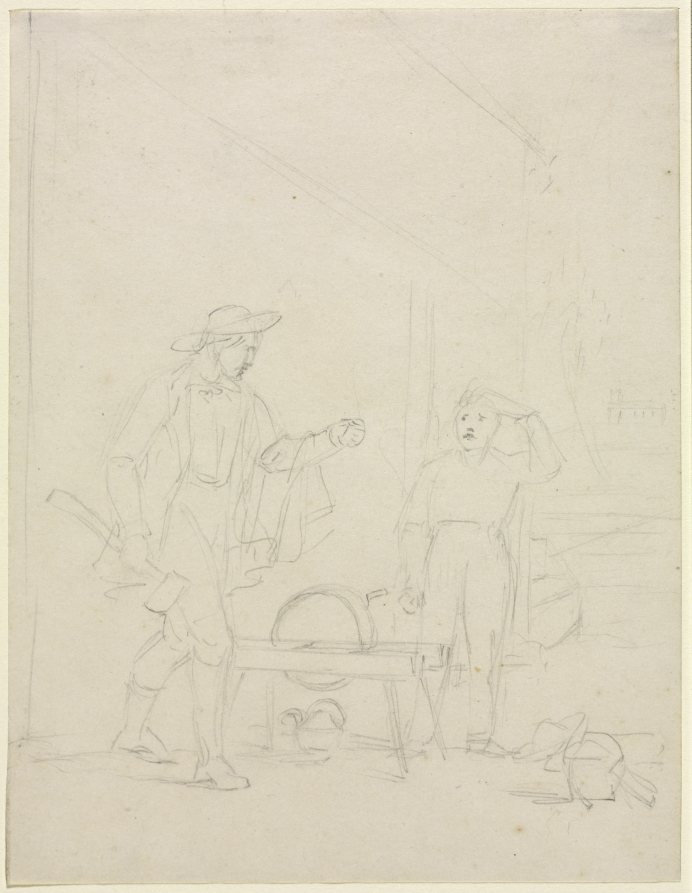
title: Who'll Turn the Grindstone?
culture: America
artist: William Sidney Mount (American, 1807–1868)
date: c. 1850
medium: graphite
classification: Drawing